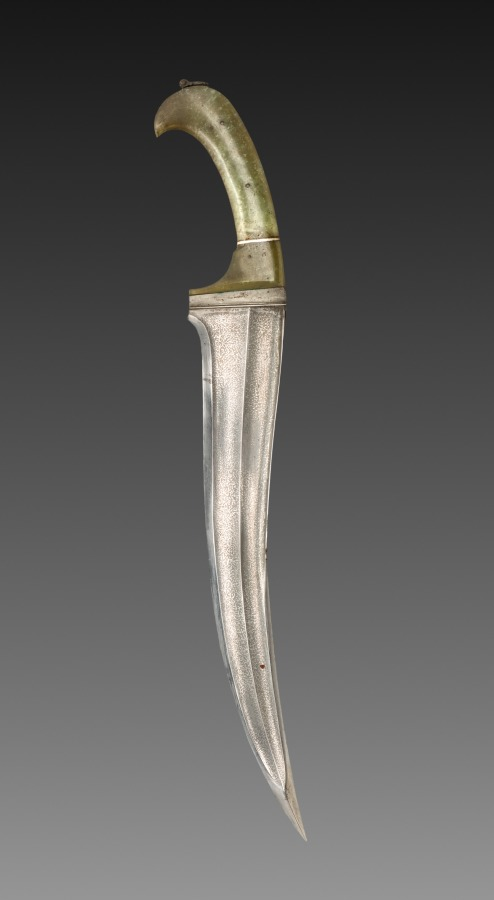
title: Knife with Jade Handle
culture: East India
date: c. 1750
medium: steel and jade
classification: Arms and Armor